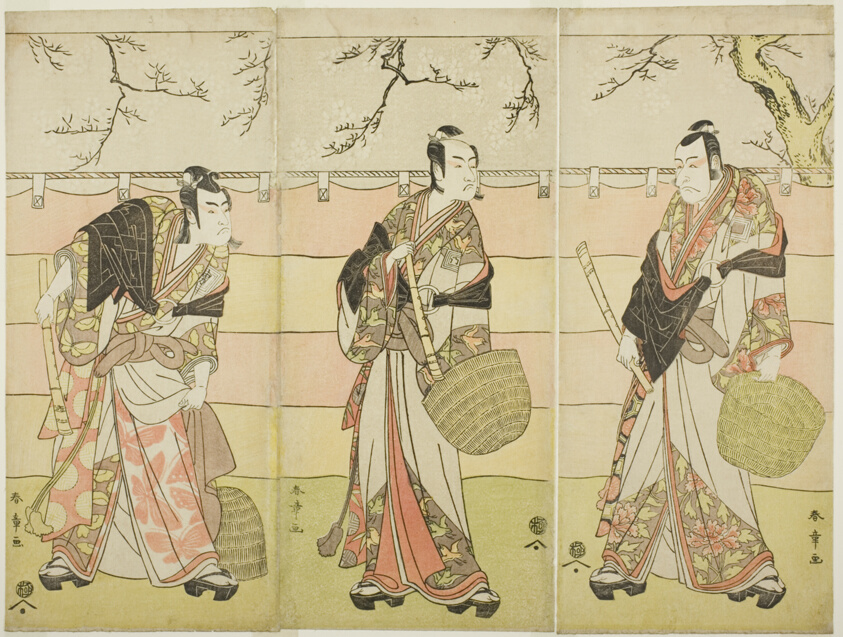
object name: Print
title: Three Komuso Monks: The Actors Ichikawa Ebizo (Danjuro V) as Kudo Suketsune (right), Ichikawa Monnosuke II as Soga no Juro Sukenari (center), and Ichikawa Omezo I as Soga no Goro Tokimune (left), in Act Six of the Play Waka Murasaki Edokko Soga (Pale Purple Soga, Edo Style), Performed at the Ichimura Theater from the Twenty-third Day of the First Month, 1792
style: Japanese (culture or style)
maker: Katsukawa Shunsho 勝川 春章; Japanese, 1726-1792; Publisher: Harimaya Shinshichi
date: c. 1792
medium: Color woodblock print; hosoban; triptych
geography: Japan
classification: woodblock print; print; asian art